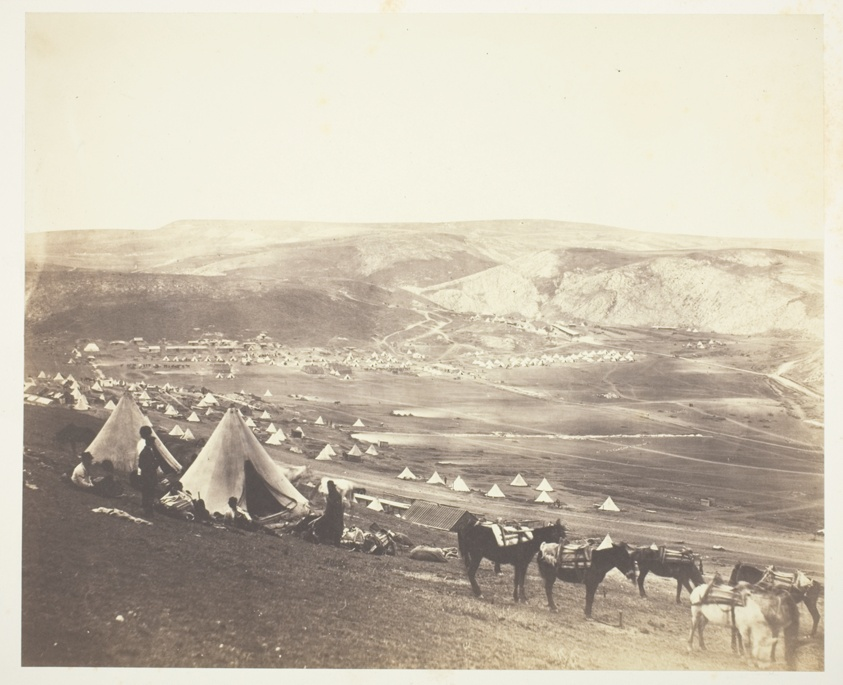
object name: Photograph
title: Cavalry Camp, Balaklava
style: 19th century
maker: Roger Fenton (English, 1819–1869)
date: 1855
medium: Salted paper print, from the album "Photographic Pictures of the Seat of War in the Crimea" (1856)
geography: England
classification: salted paper print; photographic process; photography; photograph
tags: Collected by Hugh Edwards, documentary